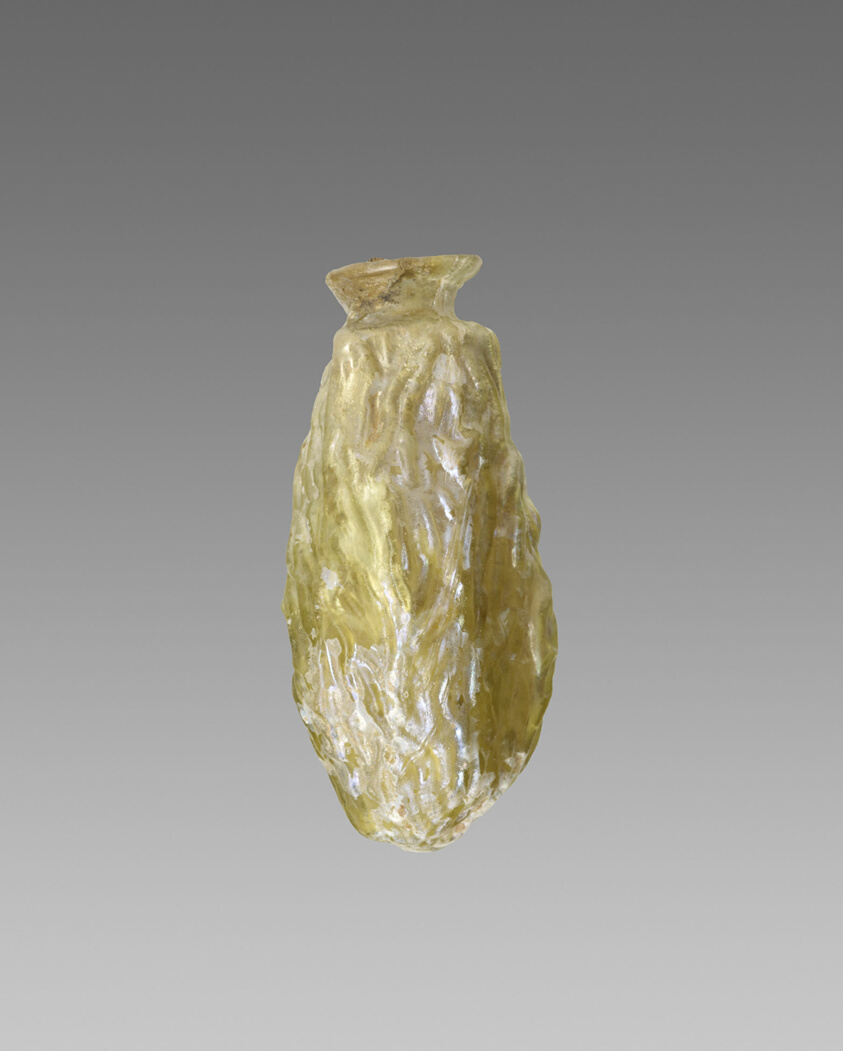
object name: Vessel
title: Bottle in the Shape of a Date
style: roman (ancient, style or period), ancient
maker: Roman; Syria or Palestine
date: 1st to mid–2nd century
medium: Glass, mold-blown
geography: Syria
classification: bottle; glass; vessel; ancient art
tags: containers, fruit